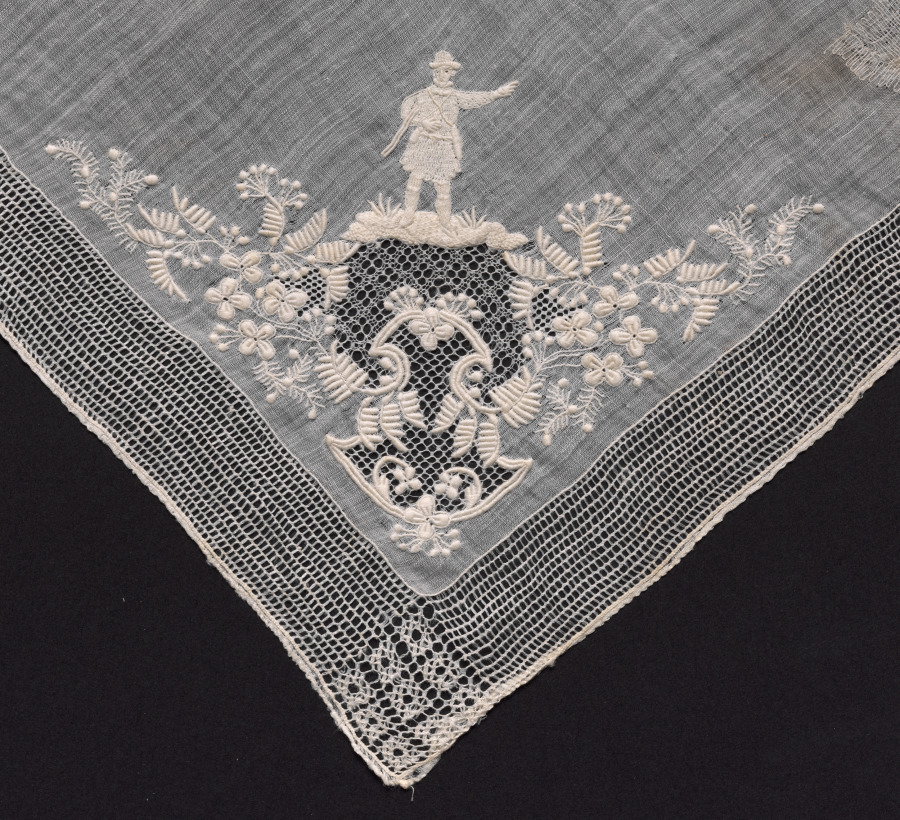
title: Embroidered Handkerchief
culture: Italy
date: 1700s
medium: Plain weave linen with needle lace (drawnwork) and embroidery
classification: Embroidery